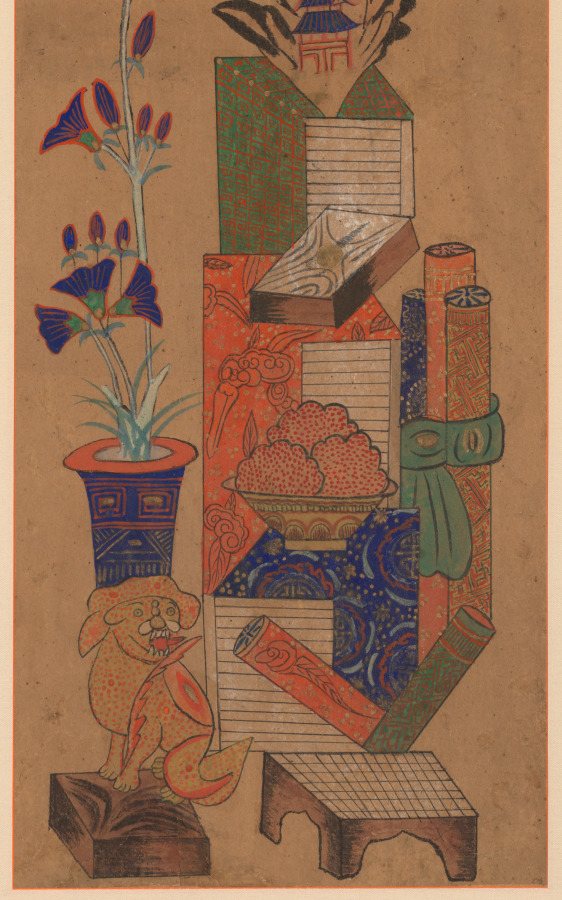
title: Munja-Chaekgeori Screen (Character-Books Screen)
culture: Korea, Joseon dynasty (1392–1910)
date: early 1900s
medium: Eight-panel folding screen, ink on paper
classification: Painting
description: This folding screen is a whimsical harmony of two different subjects: chaekgeori, or books and things; and munja, or characters. The lower section of each panel depicts the imagery of things, including books, decorative arts, and utilitarian objects. The upper portion of each panel bears a classical Chinese character. Read from far right to left, the eight characters refer to the values of Confucian teachings of the Joseon dynasty: filial piety, brotherly love, loyalty, trust, propriety, righteousness, modesty, and humility. While these two pictorial genres are harmoniously conjoined on the same picture plane, two sharply contrasting world views—urban consumerism and traditional Confucian ethics that despise materialism—compete with one another.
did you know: The eight Korean characters each mean filial piety, brotherly love, loyalty, trust, propriety, righteousness or justice, modesty or integrity, and humility or the feeling of shame.